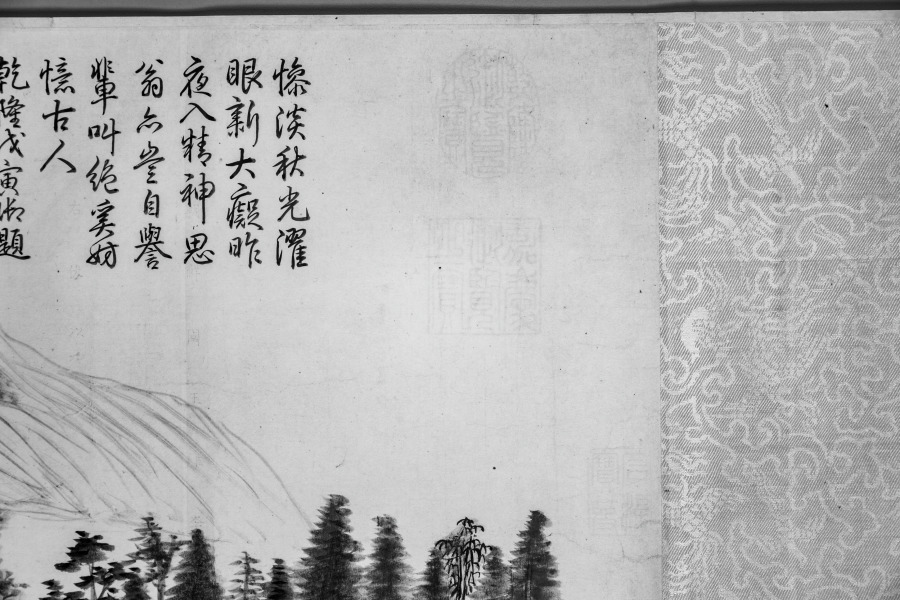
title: River and Mountains on a Clear Autumn Day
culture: China, Ming dynasty (1368–1644)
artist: Dong Qichang (Chinese, 1555–1636)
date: c. 1624–27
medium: Handscroll; ink on Korean paper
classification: Painting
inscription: 黃子久江山秋霽似此，當恨古人不見我也。思翁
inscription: 董文敏每遇高麗鏡面箋，書畫尤為入神。此卷改表紙用之，字跡隱然，兼有朝鮮之印。至於筆法圓秀，真接倪黃。豈文沈所可同日而語也。 康熙庚午中秋後一日，天氣澄爽，重裝初畢，跋於瓶廬。抱瓮翁高士奇。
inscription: Second inscription by Gao Shiqi 高士奇 (1645–1704): On the twenty-third day of the ninth month, the jiaxu year of the Kangxi era [1694], I packed my bags to head north. When my boat passed Wuchang [Suzhou], Mr. Mantang [Song Luo] brought wine to bid me farewell so that we could share our thoughts on our separation in the last few years. I showed him the paintings and calligraphy which I collected and asked his opinions. Since Mr. Mantang does not own any handscrolls by Wenmin [Dong Qichang], I leave this one for him in commemoration of our parting; thus the painting will have a worthy owner and our meeting will become a beautiful story in the future. It is the fourth day after the beginning of winter, with the sky clear and sober. Trees under frost have turned red and yellow, seemingly echoing the brush and ink in the painting. I also ask Mr. Mantang to inscribe a poem to commemorate our meeting so that it will survive forever.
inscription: 1 colophon and 4 seals of Song Luo 宋犖 (1634–1713): Who is the foremost art connoisseur of our dynasty?/ Tangcun [Liang Qingbiao, 1620–1691] is dead, so the title passes to Jiangcun [Gao Shiqi]./ Leaving office, you retired for five years in the Lake region./ Fondling handscrolls and hanging scrolls from morning to evening./ You sent me your collection catalogue Xiao Xia Lu last year;/ It is indeed the true equal of [Zhou Mi's] Yun Yan Guo Yan./ This year you returned to the capital by imperial order;/ Your boat with calligraphy and paintings anchored at the river bank in Suzhou./ When we met each other you did not waste any time for conversation by poured out immediately/ From your "coral net" extraordinary treasures./ You produced incomparable scrolls, with gold-inscribed labels and jade rollers,/ Pouring out from bags and trunks, they were spread in disarray./ Without a word, I rolled and unrolled until my fingers were numbed,/ We sat straight, facing each other quietly, and never felt tired./ For three days we forgot about sleeping and food./ And at times we shouted our joy out loud, forgetting who is host or guest./ Your Dwelling in the Fuchun Mountains and the Yuansheng manuscript/ These peerless works I myself examined with delight./ As an added pleasure to the farewell dinner under the Maple Bridge,/ You allowed me to hold again this handscroll by Dong Qichang--/ The Misty River and Piled Peaks [by Zhao Mengfu] and this Clear Autumn Day are two extraordinary masterpieces./ In showing such life and spirit with "qi yun." the artists were truly "men of heaven."/ The Clear Autumn Day is not even three feet long,/ Painted on tributary Korean paper, it shines like silver./ Every building up and every turn of the mountains imitates nature,/ Every tree and every rock is removed from the commonplace./ From the beginning, the theory of poetry is the theory of painting,/ Like the lotus and the morning sunshine, they complement and refresh each other./ The artist's inscription regrets that "the Old Masters cannot see my scroll."/ Huang Gongwang would have agreed in his grave./ The vermilion of the seals glitter and dazzles the eyes,/ These added accessories are as valuable as jade./ You are very kind to give it to me,/ The feelings expressed in your inscription are so sincere./ Wanting to refuse, but unable, I accept it to respect your wish,/ And taking off my gown and cap I wrapped it with care./ You asked me to write a long poem in commemoration of this beautiful occasion,/ I am too ashamed that my effort in response is so poor and inadequate./ Returning home, I unrolled it under candlelight, trying to write the colophon,/ The light of the waning moon shines at the foot of the mossy wall./ Earnestly humming and brows knit in deep thought, I try to compose;/ The verses are not outstanding, but the facts are real./ With this poem recorded at the end of the scroll, I mail it to you for approval,/ This poem and this painting shall outlast a thousand springs. (Translation by LYSL/HK/WKH)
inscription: 1 colophon and 2 seals of Shao Changheng 邵長蘅 (1637–1704); 2 inscriptions and 14 seals of the Qianlong 乾隆 emperor (r. 1736–95); 1 seal of the Jiaqing 嘉慶 emperor (r. 1796–1820); 3 seals of the Xuantong 宣統 emperor (r. 1908–11); 1 seal unidentified.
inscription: [印] 朝鮮國王之印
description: Dong Qichang had a tremendous impact on the artistic practices and historiography of later generations; his works and writings shaped literati aesthetics. Here, Dong places an abstract landscape composition diagonally across the picture plane, configured to recall earlier masters and simultaneously express his own personal style. Dong’s inscription claims, Huang Gongwang’s Autumn Day, looks like this. I truly regret the master has not seen my work. In fact, Dong Qichang may have had Dong Yuan’s Xiao and Xiang Rivers in mind, a work he owned and considered a key work in Chinese art history.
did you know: The painting has an imprint of a Korean seal that reads "Seal of the king of Joseon."